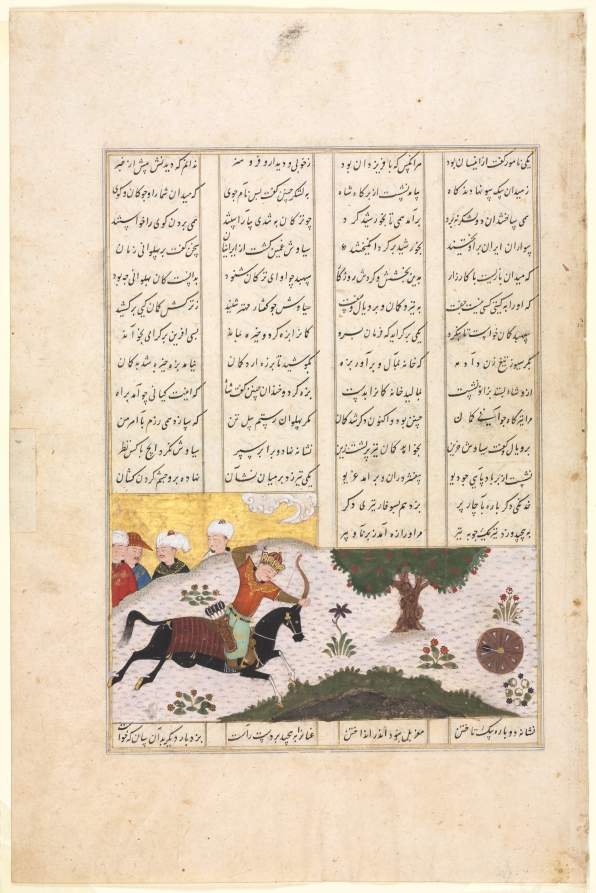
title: Siyavush on His Horse Hitting a Rolling Target, from a Shahnama (Book of Kings) of Firdausi (940–1019 or 1025) (recto)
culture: Iran, Shiraz, Timurid period (1370-1501)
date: late 1400s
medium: Opaque watercolor, silver, gold, and ink on paper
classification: Manuscript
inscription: script: Nasta'liq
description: A prince from Iran’s early legendary history, Siyavush was sent by his father, the shah, to train under the great warrior Rustam in the arts of hunting, archery, and horseback riding. In this painting, Siyavush demonstrates his considerable skill by hitting the bulls eye on a rolling target from horseback. The gold sky, pastel ground with grassy tufts, and dense leafy riverbank are distinctive features of Persian painting during this period.